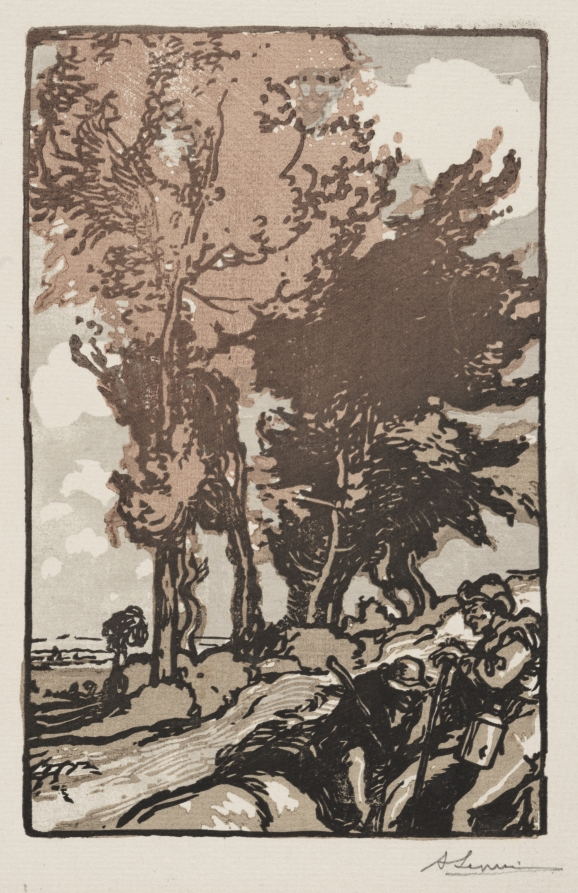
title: The Resting Place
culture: France, late 18th-early 19th Century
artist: Auguste Louis Lepère (French, 1849–1918)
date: 1904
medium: chiaroscuro woodcut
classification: Print